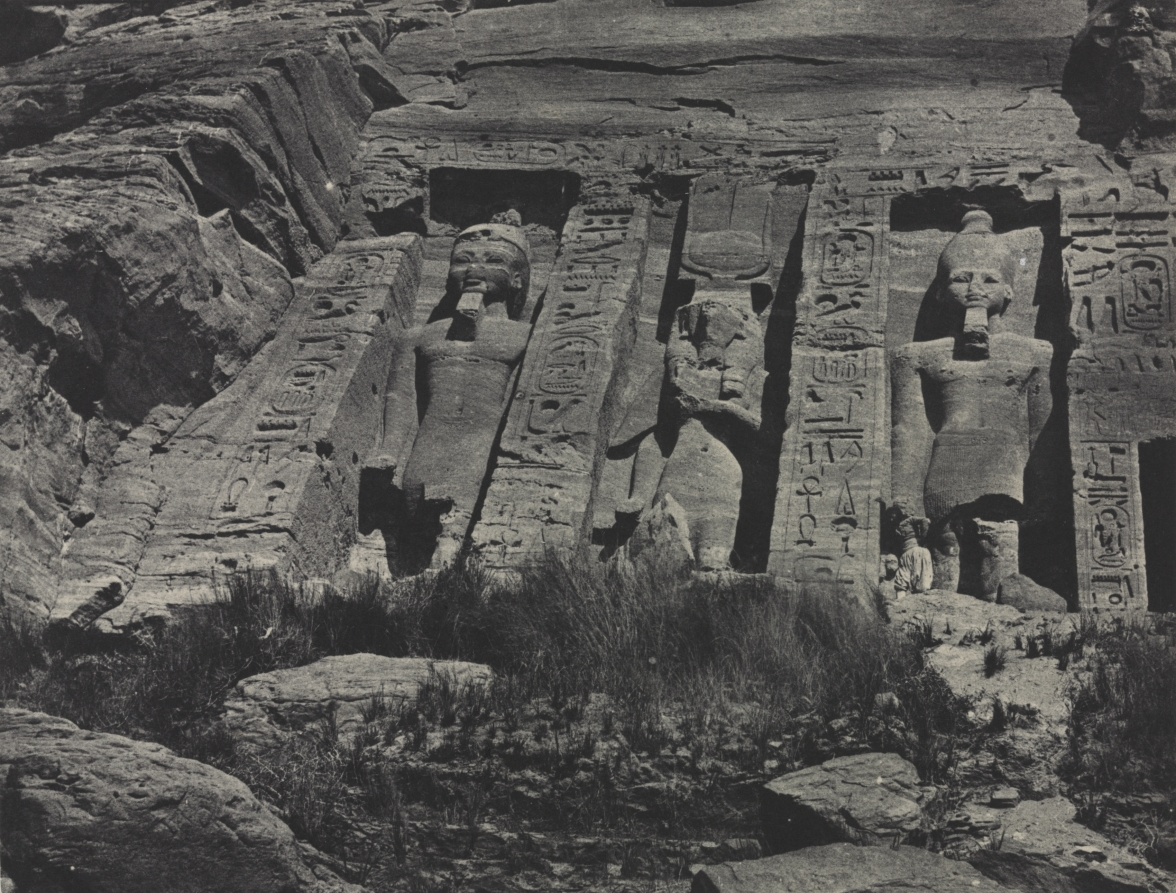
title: Southern Portion of the Rock-cut Temple of Hathor, Abu Simbel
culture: France, 19th century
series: Égypte, Nubie, Palestine et Syrie. Dessins photographiques receuillis pendant les années 1849,1850 et 1851 accompagnes d'un text explicatif et précédés d'une introduction par Maxime Du Camp, pl. 10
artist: Maxime Du Camp (French, 1822–1894)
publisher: Gide et J. Baudry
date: 1850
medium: salted paper print from calotype negative, Blanquart-Évrard process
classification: Photograph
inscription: none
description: Du Camp was the first photographer to depict the marvels of ancient Egypt. In 1849 a scholarly association commissioned the young writer to document Egyptian monuments and their hieroglyphics. He learned to photograph shortly before embarking for Egypt in the company of the young novelist Gustave Flaubert. In 1852 Du Camp published an album of photographs of Egypt, Nubia, Palestine, and Syria, which brought him widespread recognition. Just as Du Camp followed in the footsteps of earlier painters and scholars, later photographers like Beato often echoed his choices of subject matter.